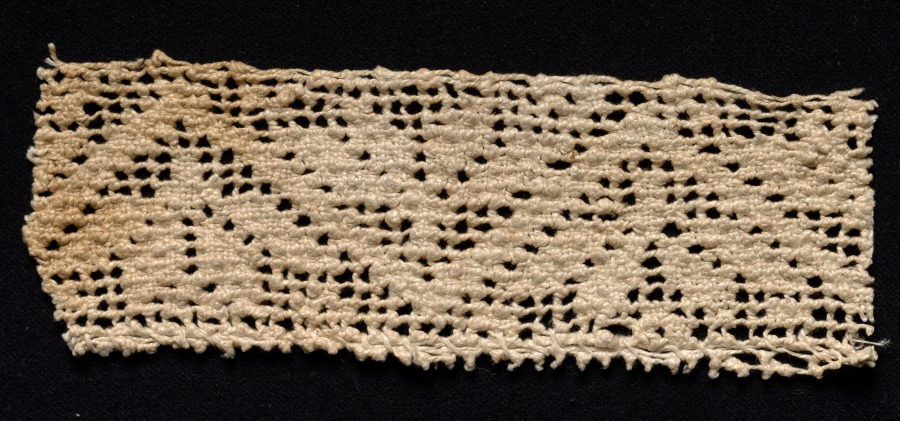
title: Fragment of a Band with Geometric Motif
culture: Spain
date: 1600s–1700s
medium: Bleached linen (est.): needle lace, filet/lacis (knotted ground and darned in two directions)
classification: Lace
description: The thick and graphic darning, or area of woven pattern, depicts triangular and circular geometric motifs. In addition to the knotting of the thread (filet/lacis technique), the lace maker used thicker thread to create the bold and heavy pattern.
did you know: Myrta Leonora Jones, the donor of this work, was a women’s rights activist in Cleveland in the early 20th century.